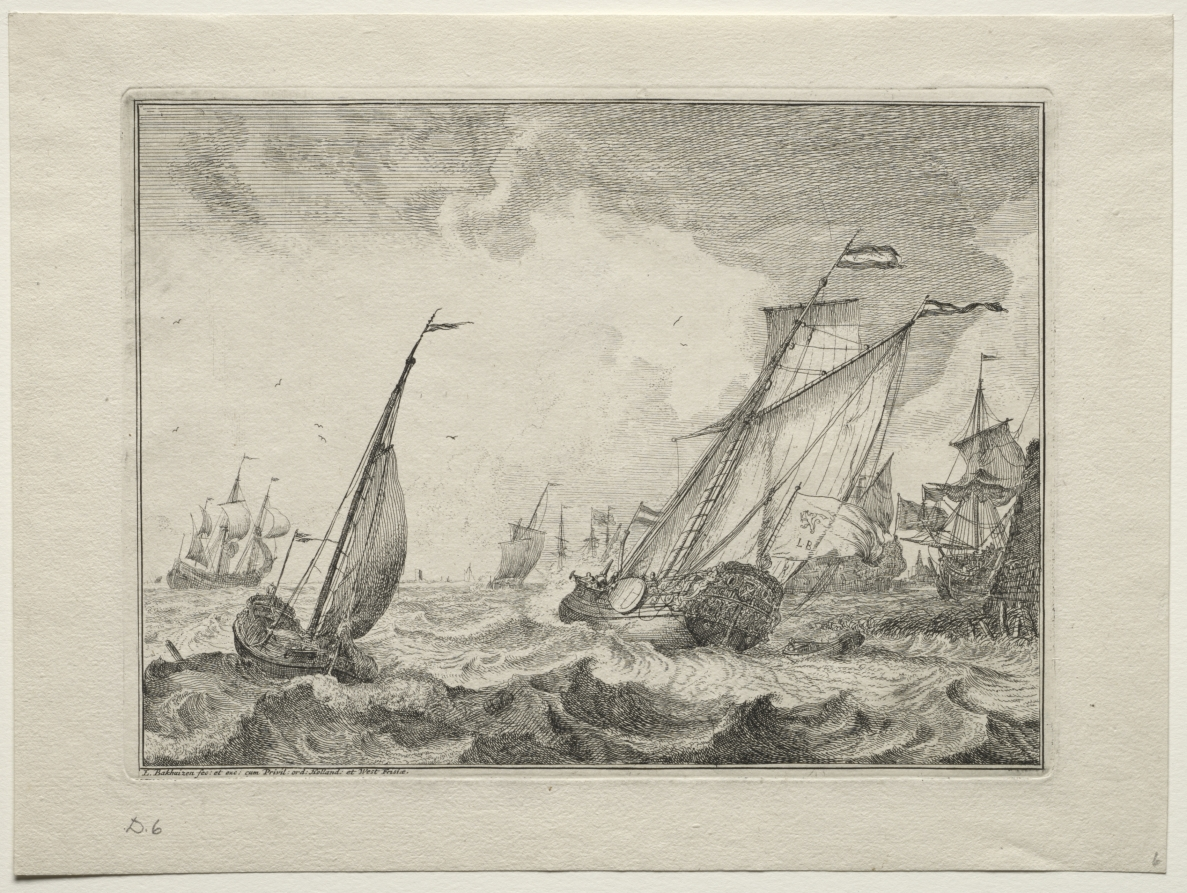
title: Ships in a Gale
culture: Netherlands, early 18th century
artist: Ludolf Backhuysen (Dutch, 1631–1708)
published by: Ludolf Backhuysen (Dutch, 1631–1708)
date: 1701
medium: etching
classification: Portfolio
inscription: center right, on flag, in plate: LB ; lower left, in plate: L. Bakhuizen fec: et exc: cum Privil: ord: Holland: et West Frisiæ ; lower left, in graphite: D. 6 ; lower right, in graphite: 6